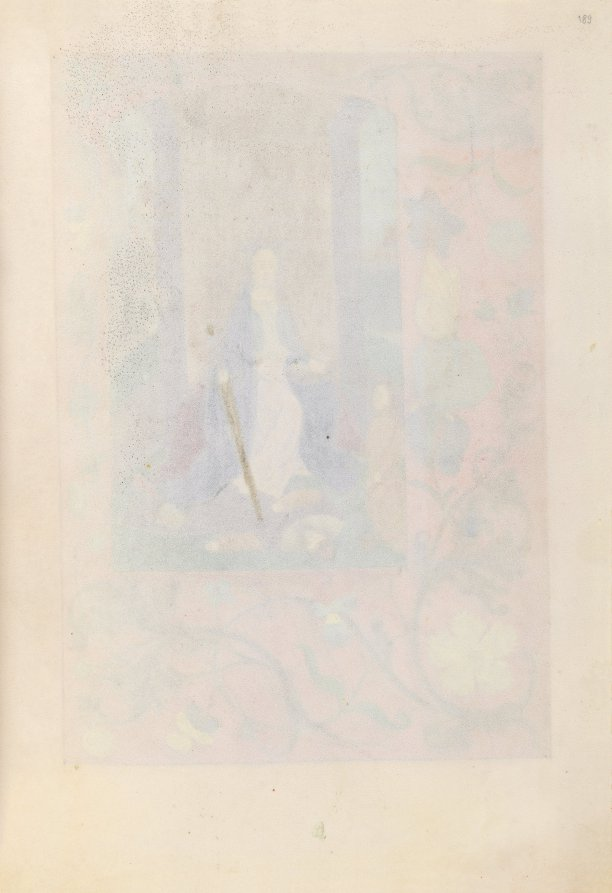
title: Hours of Queen Isabella the Catholic, Queen of Spain: Fol. 189r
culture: Flanders, Ghent and Bruges, late 15th century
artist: Master of the First Prayerbook of Maximillian (Flemish, c. 1444–1519)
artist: and Associates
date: c. 1500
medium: ink, tempera, and gold on vellum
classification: Bound Volume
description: This manuscript was illuminated by a circle of at least five highly organized manuscript painters active in the Flemish cities of Ghent and Bruges. The principal illuminator was Alexander Bening, who painted the majority of the book's miniatures. Manuscripts produced by this circle of artists are renowned for the decoration of their borders, which typically feature a rich variety of realistically-painted flowers, birds, and butterflies. This prayer book, called a book of hours, was intended not for a cleric, but for the private devotions of a lay person-in this case, Isabella the Catholic, Queen of Spain (1451-1504). Isabella's coat of arms embellishes the book's frontispiece. It is unlikely that the book was commissioned by the Queen herself; rather, she probably received it as a diplomatic gift from someone courting her patronage, perhaps Cardinal Francisco Jimenez de Cisneros. A Franciscan friar, Jimenez was dependent upon Isabella for his advancement, first to the post of Queen's confessor in 1492, and then to Archbishop of Toledo in 1495.